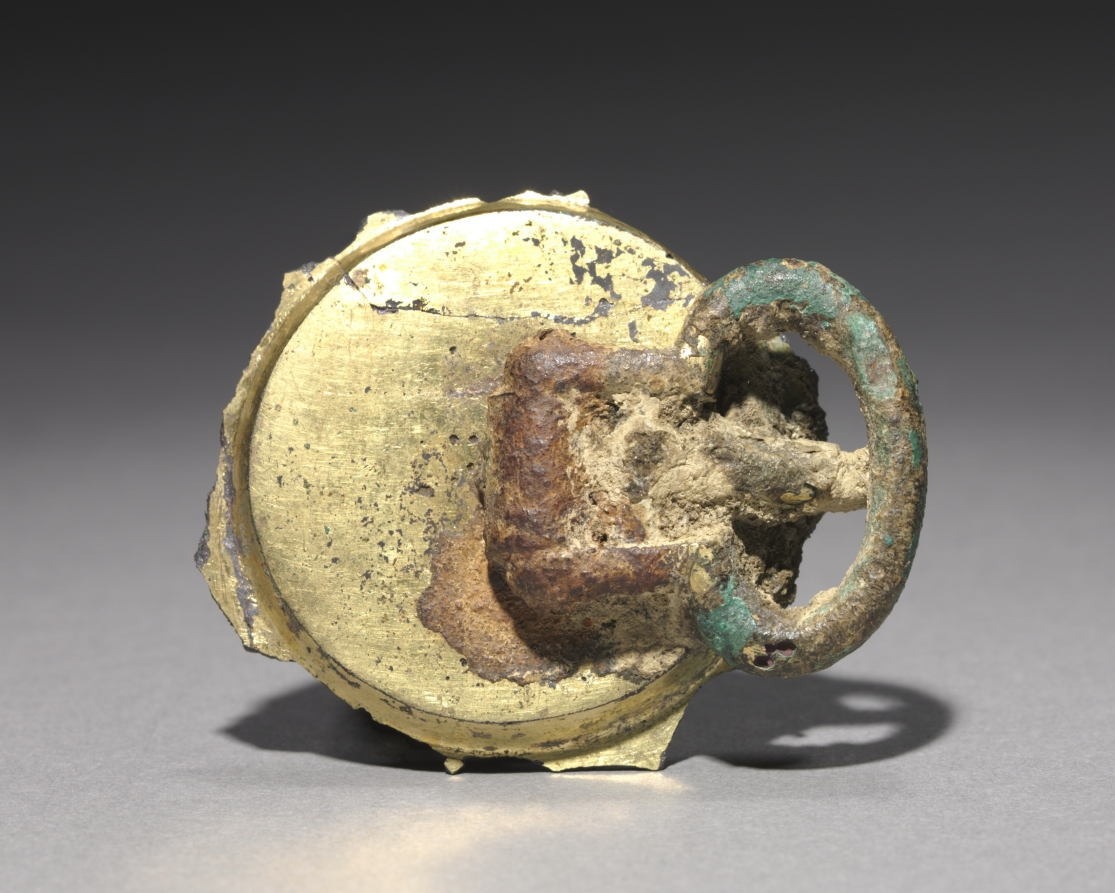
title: Belt Buckle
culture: Korea, Goryeo dynasty (918–1392)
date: 1100s-1200s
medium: Gilt bronze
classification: Metalwork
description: Metallurgy advanced remarkably in the Goryeo period (918–1392), explaining why a large quantity of sophisticated metal artifacts with delicate designs were used not only as daily accessories but also as burial goods. Once coated in brilliant gold, belt buckles like this one were fixed to leather belts.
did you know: The Japanese antique dealer Yamanaka & Company, which opened its branches in New York (1895) and Boston (1899), sold small Korean archaeological materials such as this belt buckle to American collectors in the early 20th century.